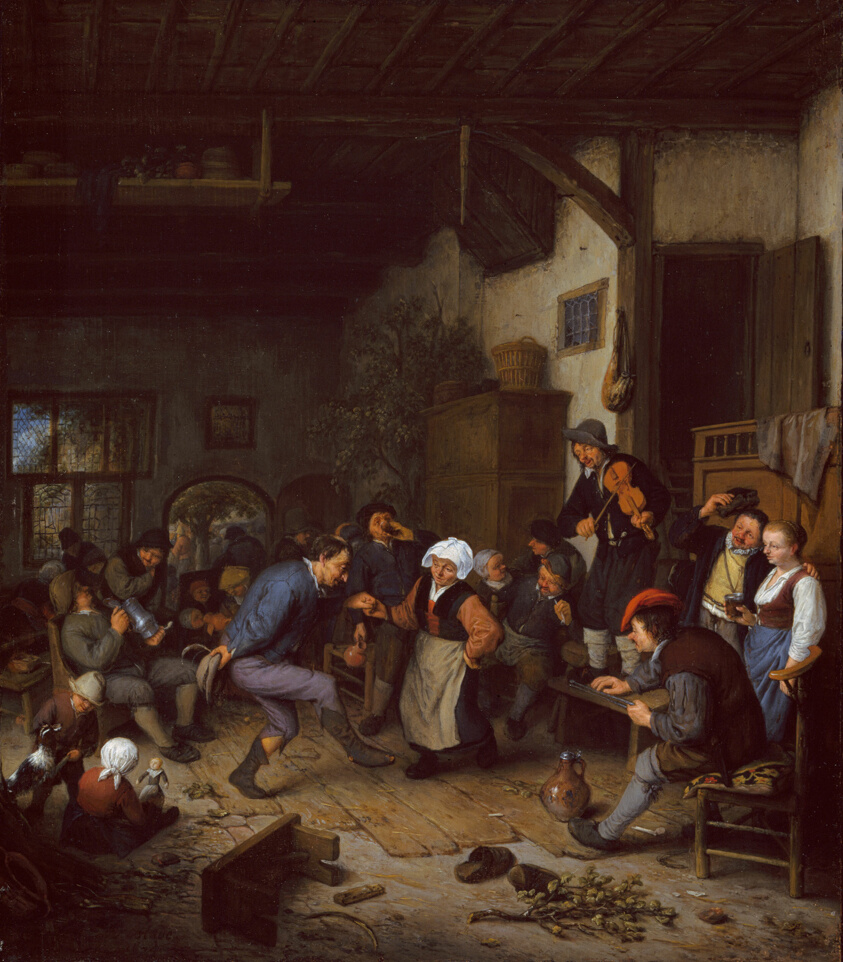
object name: Painting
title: Merrymakers in an Inn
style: 17th Century, dutch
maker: Adriaen van Ostade (Dutch, 1610–1685)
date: 1674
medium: Oil on panel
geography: Holland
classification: oil on panel; paint; painting; european painting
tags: taverns, children, dance, dancing, drinking, figures, instruments, interior, men, music, musicians, smoking, woman